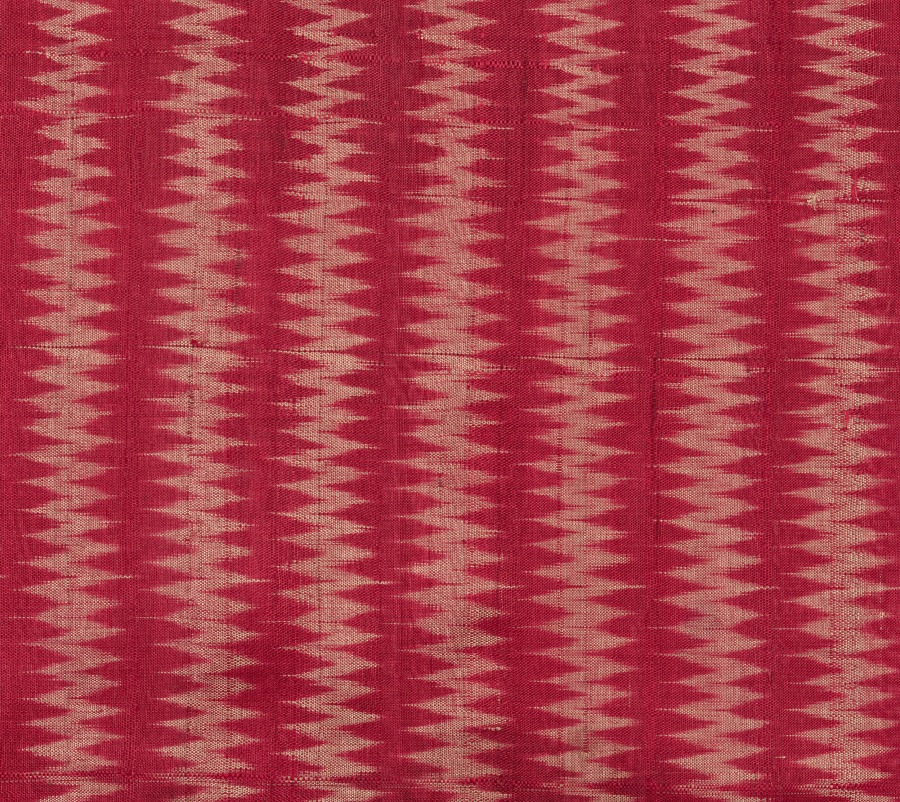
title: Fragment of Striped Panel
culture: Western India, Gujarat, Surat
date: 1900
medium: tabby weave, warp ikat; silk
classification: Textile